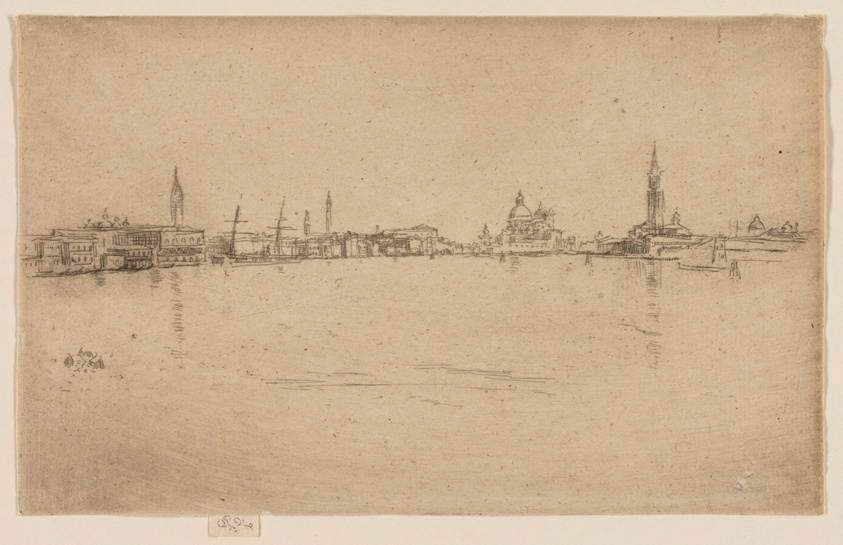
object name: Print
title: Salute Dawn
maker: James McNeill Whistler (American, 1834-1903)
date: 1879/80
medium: Etching and drypoint with foul biting in black ink on ivory laid paper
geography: United States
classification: etching; foul biting; print; prints and drawing; paper; drypoint